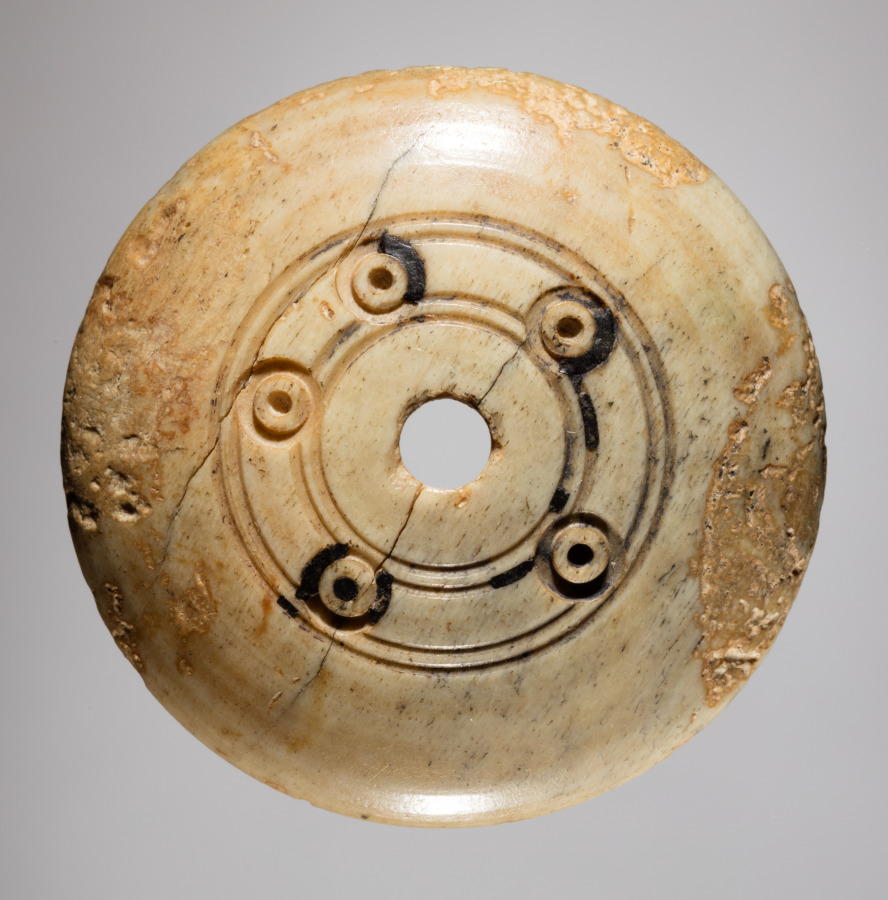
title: Spindle Whorl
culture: Iran, early Islamic period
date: 700s - 900s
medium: bone, incised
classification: Spindle Whorl